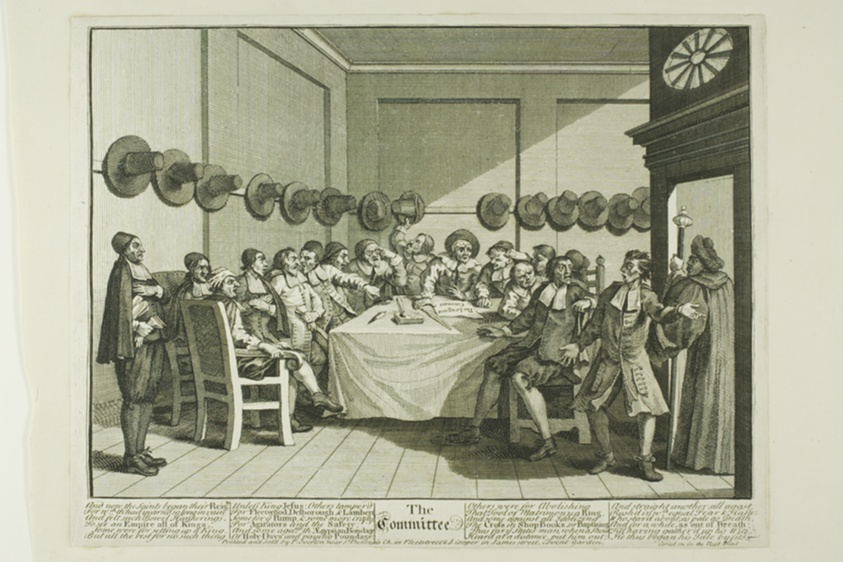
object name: Print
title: The Committee, plate ten from Hudibras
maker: William Hogarth (English, 1697-1764)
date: February 1725/26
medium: Etching and engraving in black on cream paper edge, mounted on cream wove paper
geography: England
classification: engraving; prints and drawing; print; etching